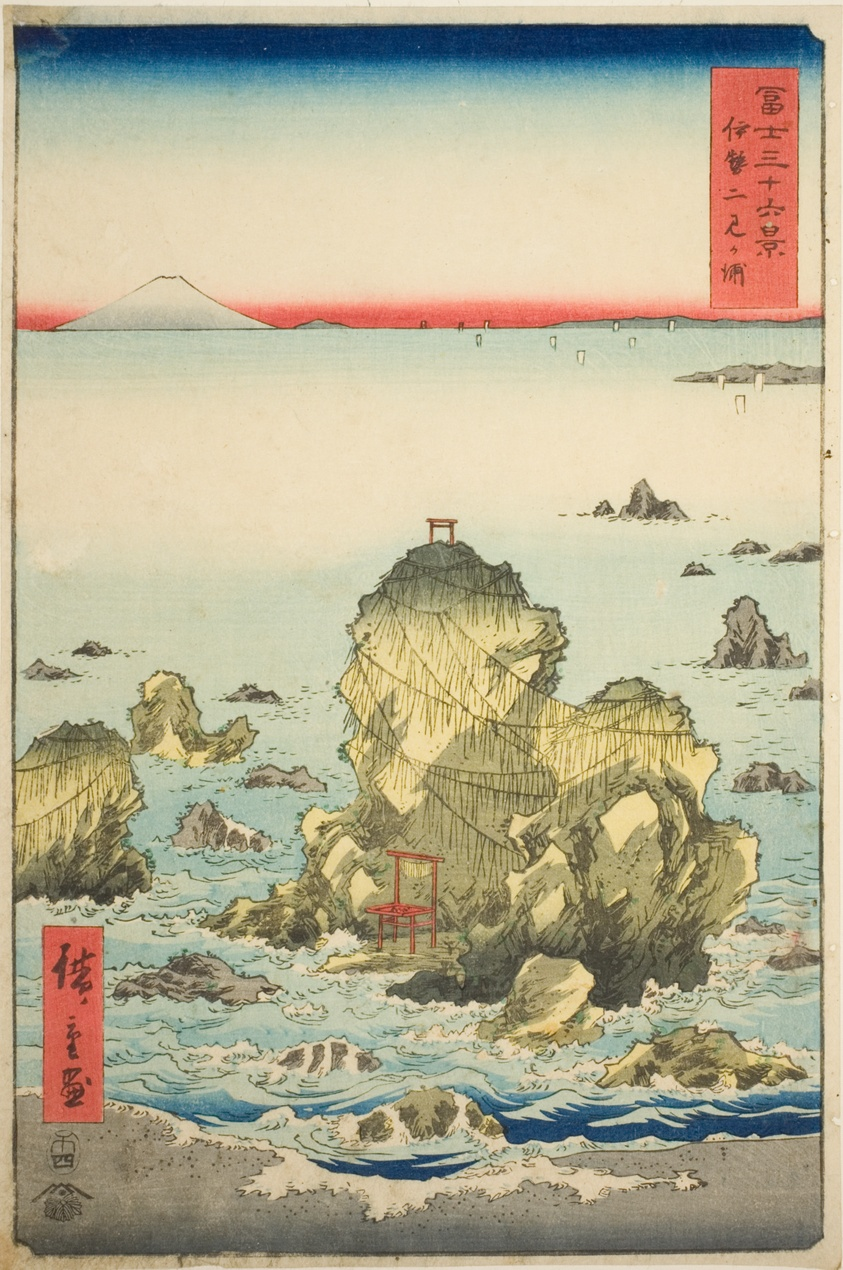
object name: Print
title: Futami Bay in Ise Province (Ise Futamigaura), from the series "Thirty-six Views of Mount Fuji (Fuji sanjurokkei)"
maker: Utagawa Hiroshige 歌川 広重; Japanese, 1797-1858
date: 1858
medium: Color woodblock print; oban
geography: Japan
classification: woodblock print; print; asian art